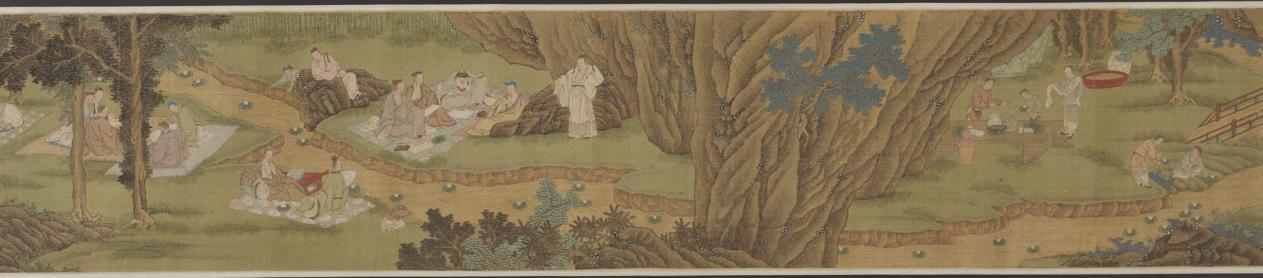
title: Purification at the Orchid Pavilion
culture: China, Qing dynasty (1644-1911)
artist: Fan Yi (Chinese, c. 1615–before 1688)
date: 1671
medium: Handscroll; ink and color on silk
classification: Painting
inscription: Artist's inscription, signature, and 2 seals: Painted by Fan Yi of Zhongfu during the second month of winter of the xinhai year [1671]. [2 seals] Fan Yi zhi yin, Zi yu yi.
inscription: Title on the frontispiece by Monk Yueshan (1629-1709).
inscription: 3 colophons and 13 additional seals: 1 colophon, dated 1707, and 6 seals of Yueshan; 2 colophons and 3 seals of Wong Kwan-Shut (Huang Junshi) 黃君實 (b. 1934); 2 seals of Fu Shen 傅 申 (b. 1937); 2 seals of Tessai Tomioka 富岡鐵齋 (1836-1924).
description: By the 1600s, the historic gathering at Lanting, Zhejiang province, in 353 CE was a common theme in Chinese painting. Originally based on a composition attributed to Li Gonglin (1049– 1106), now lost, Wu school artists revived the theme. Fan Yi, the brother of the artist Fan Qi from Nanjing, used delicate brushwork and luminous colors to depict the spring gathering.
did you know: The gathering’s host is in the Orchid Pavilion at the end of the scroll, representing an episode known as “Wang Xizhi Watching the Geese 王羲之觀鵝圖.”